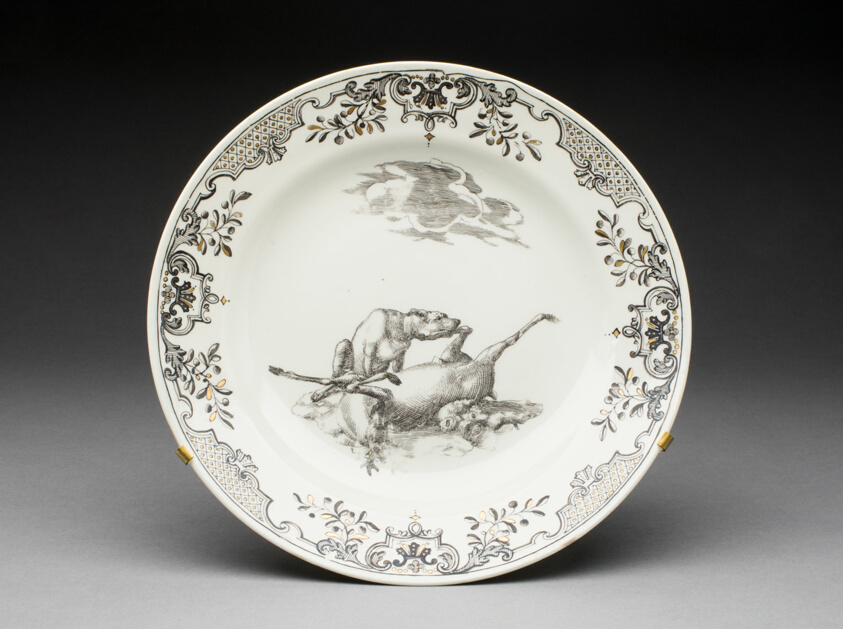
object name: Ceramics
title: Plate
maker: Du Paquier Porcelain Manufactory (Austrian, 1718-1744)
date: c. 1735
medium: Hard-paste porcelain, monochrome black, and gilding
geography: Vienna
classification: plate (general, dish); tableware; dish (vessel); porcelain; european decorative arts; ceramics